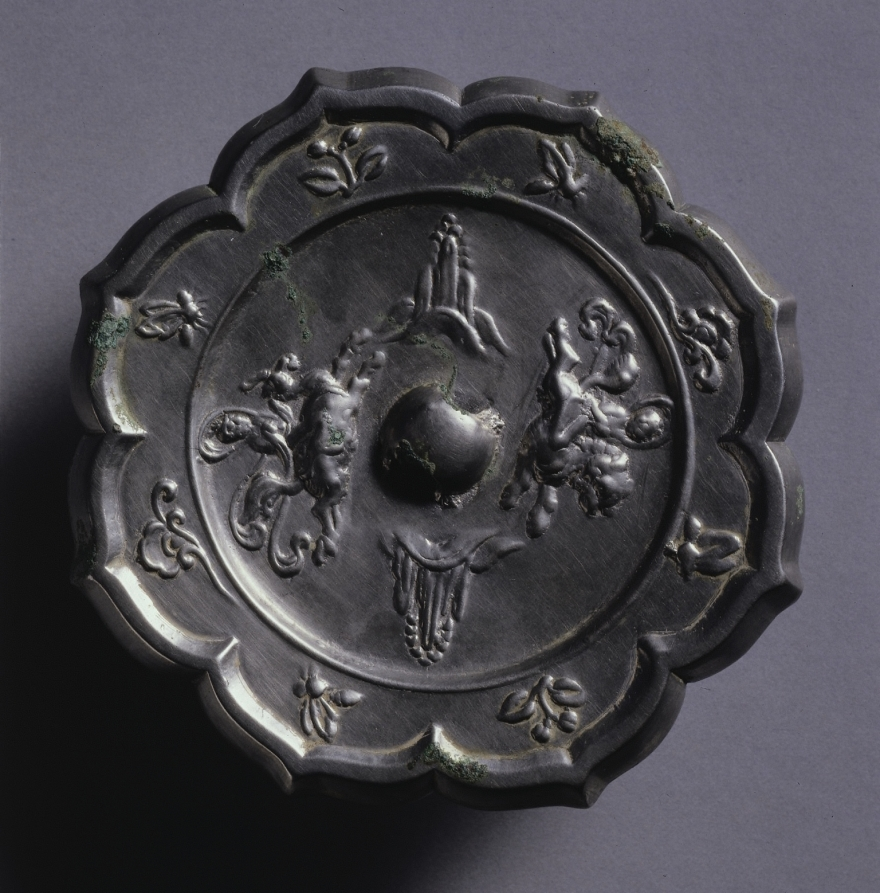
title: Octafoil Mirror with Riding Immortals and Rising Peaks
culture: China, Tang dynasty (618-907)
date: 600s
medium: bronze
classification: Metalwork